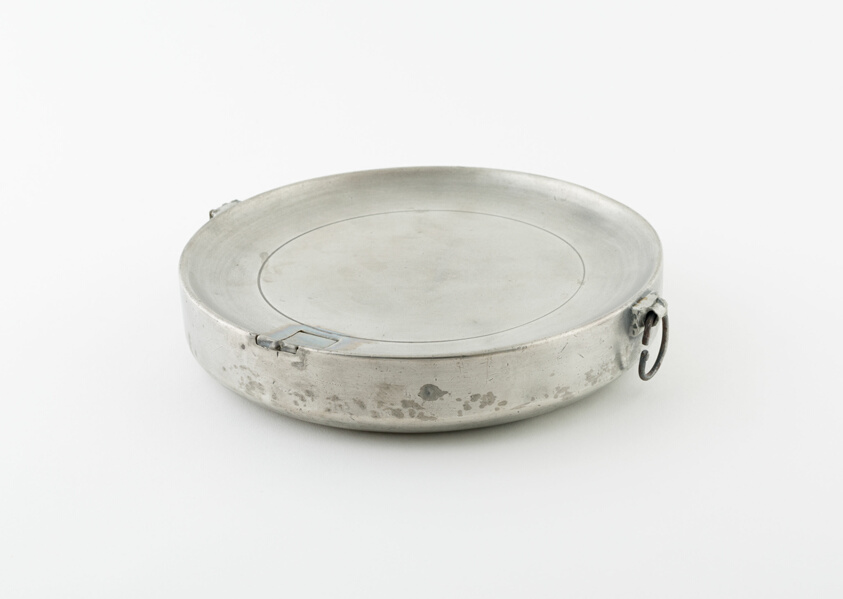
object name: Metalwork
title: Hot Water Dish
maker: Carpenter and Hamberger; English, active c. 1790-1810; England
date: c. 1800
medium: Pewter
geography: London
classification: dish (vessel); pewter; household accessory; metalwork; european decorative arts